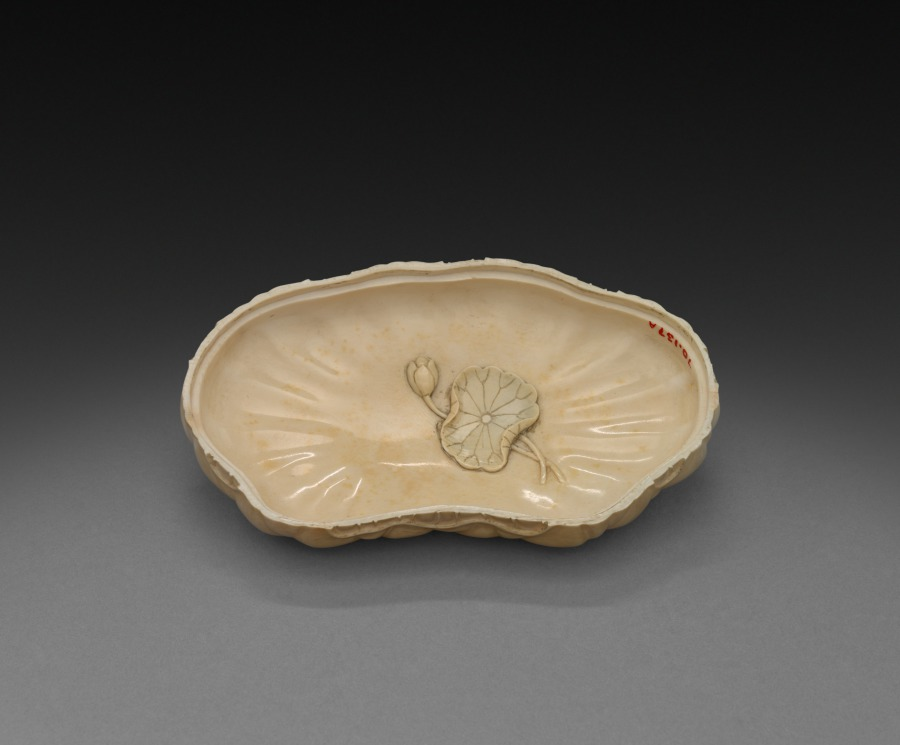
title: Box in Form of Lotus Leaf (lid)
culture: China, Qing dynasty (1644-1911)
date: 1700s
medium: ivory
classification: Ivory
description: In the Qing dynasty (1644–1911), luxury items became more affordable to larger parts of the society, including women, merchants, and literati in non-official positions. Imperial patronage and a growing urban population encouraged consumption of luxury goods and local craftmanship. This fine-grained, light yellow ivory carved in the shape of a lotus leaf illustrates the superb carving skills and the creative mind of the talented artisan who sought clients on a competitive market.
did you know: Inside each box is a lotus pond and two swimming ducks carved in high relief.